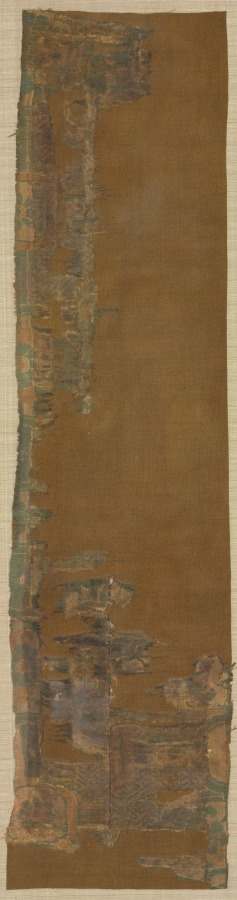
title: Vajrapani Embroidered Mount with Garuda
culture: China and Tibet, Embroidery: China, Yuan dynasty (1279-1368); painting: Tibet, 17th century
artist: Choying Dorje, the Tenth Black Hat Karmapa (Tibetan, 1604–1674)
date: painting 1600s, embroidery c. 1300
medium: Opaque watercolor, gold, and silver on silk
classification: Embroidery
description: The painting depicts the Buddhist protector who holds (pani) the thunder bolt (vajra) in his right hand. He kneels in reverence and holds his left hand in a gesture of salute. This unusual image appears to have been the vision of a Tibetan monastic patriarch known for creating his own inventive paintings and sculptures. Sewn to the painting are Chinese damask borders and rare embroideries dating to the Chinese Yuan dynasty (1279–1368). They depict man-eagle figures known as Garuda, a form occasionally assumed by Vajrapani.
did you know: Vajrapani sometimes takes the form of Garuda, enemy of snakes.